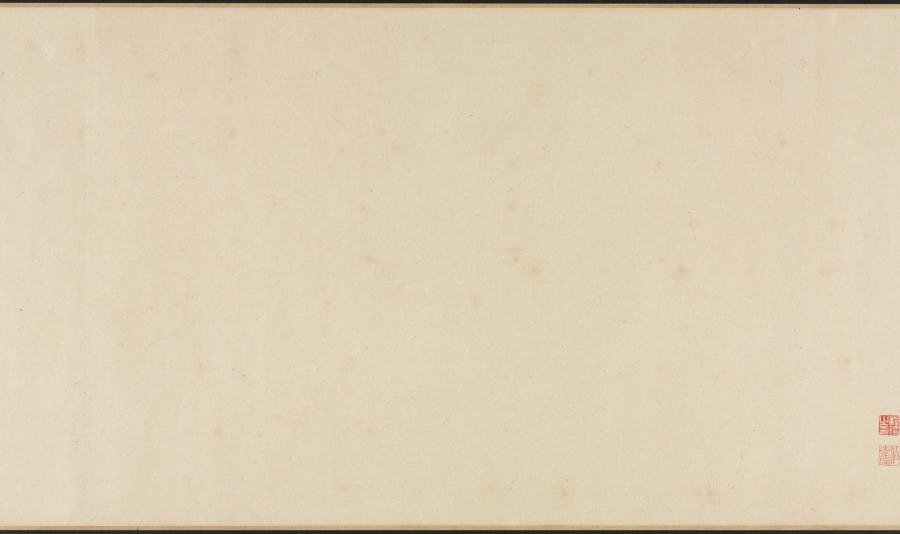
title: Water Village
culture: China, Ming dynasty (1368–1644)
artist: Wen Boren (Chinese, 1502–1575)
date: 1570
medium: handscroll; ink and light color on paper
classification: Painting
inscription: 隆慶庚午秋仿趙文敏筆. 五峰文伯仁 [印] 五峰山人; 文伯仁印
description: In the autumn of 1570, Wen Boren painted this seemingly unemotional scene of low-lying marshlands with a chain of rounded mountains in the background. A fishing boat is nestled on the shore near the village. Although paths and bridges traverse the landscape, only two people are visible in the stillness. From the restrained atmosphere of this landscape, one would never guess that Wen Boren was known as the “bad boy” of the Wu School for his explosive temper. As a younger man, he was even embroiled in a contentious lawsuit with his own uncle, Wen Zhengming (1470–1559), a master of Ming dynasty painting with whom he had trained. The ideal of the scholar-painter, or literati, was that an artist’s moral character is reflected in his paintings, so there was great incongruity between Wen Boren’s difficult personality and his restrained landscapes. A contemporary, Wang Shizhen, wrote this about him: "This gentleman is prone to behave odiously and screamed accusations at people. How is it possible for him to carry in his bosom such a wealth of scenic wonders?" Who knows what effort it took to subdue his fractious spirit to project an image of coolness and refined taste in his paintings?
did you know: A foreground tree has an eccentric twisting silhouette and pepper-dot "halo" of leaves.